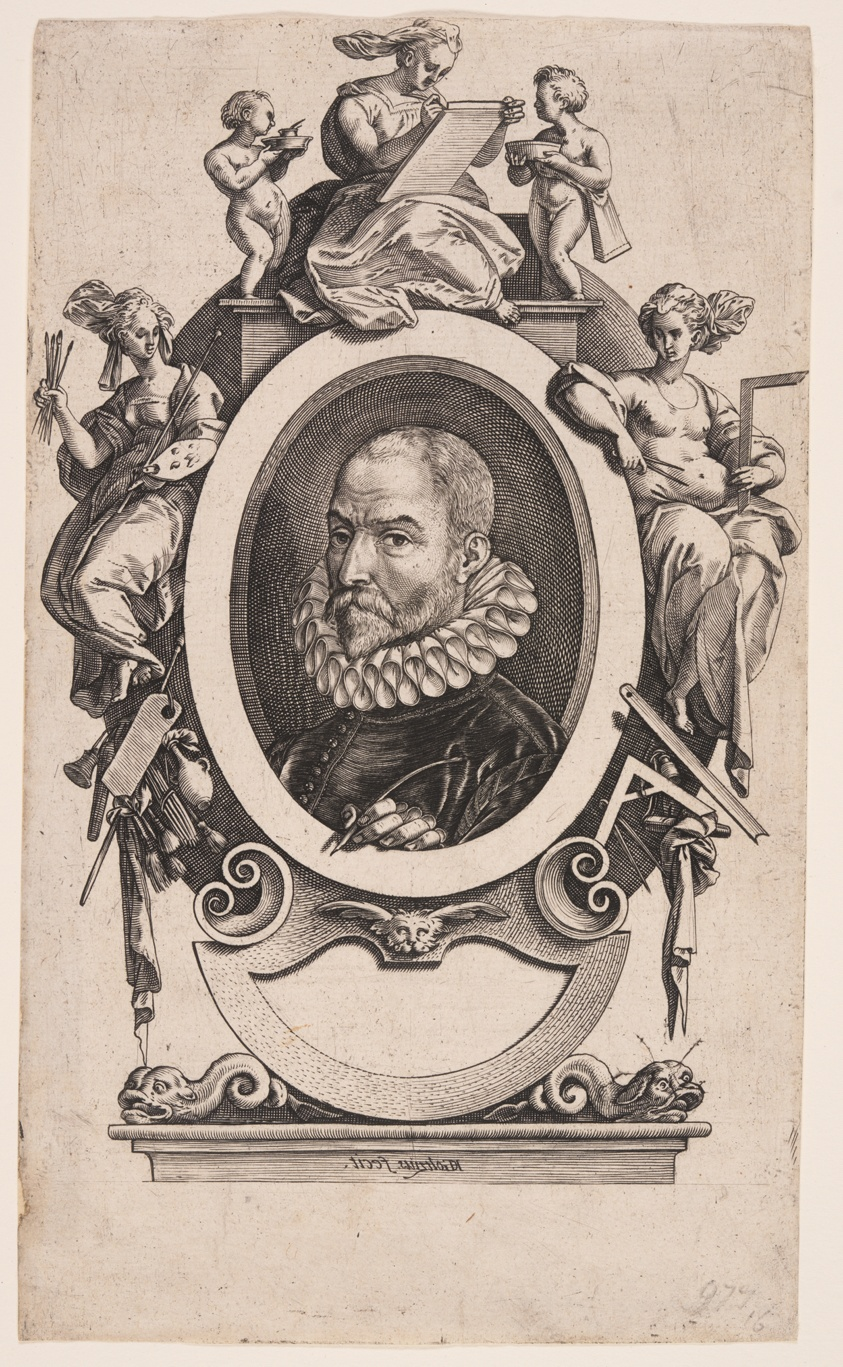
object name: Print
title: Johannes Stradanus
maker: Hendrick Goltzius (Dutch, 1558–1617)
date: 1580/90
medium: Engraving on laid paper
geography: Netherlands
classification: engraving; paper; print; prints and drawing